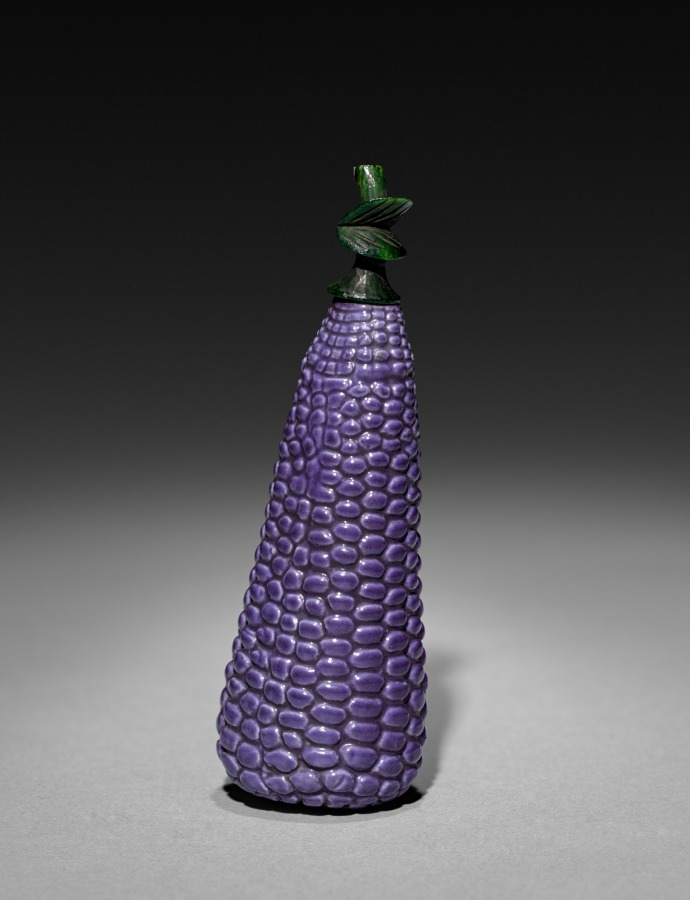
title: Snuff Bottle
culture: China, Qing dynasty (1644-1911)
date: 1644–1911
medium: glass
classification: Glass